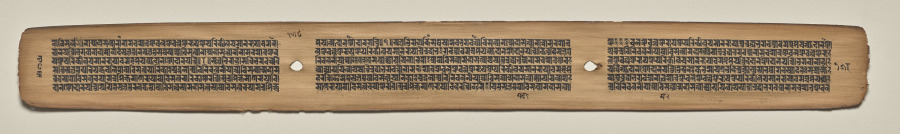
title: Text, folio 158 (verso), from a Manuscript of the Perfection of Wisdom in Eight Thousand Lines (Ashtasahasrika Prajnaparamita-sutra)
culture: Eastern India, Bihar, Vikramashila Monastery. Painting: Nepal, Kathmandu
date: Sunday, September 14, 1119 (year 239 of the Newar Samvat in the month of Ashvina)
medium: gum tempera and ink on palm leaves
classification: Painting